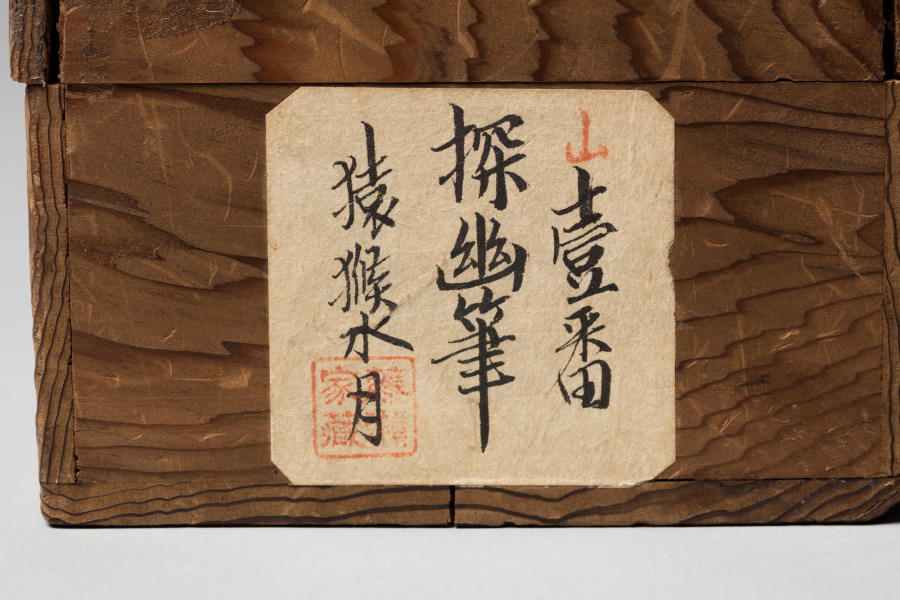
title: Gibbons Reaching for the Moon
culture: Japan, Edo period (1615–1868)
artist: Kano Tan’yū (Japanese, 1602–1674)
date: 1600s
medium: Hanging scroll; ink and light color on silk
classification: Painting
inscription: signed: "Tan'yūsai hitsu"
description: Long-armed gibbons form a chain to reach down from a tree, hoping to touch what they believe is the moon. In fact, the orb remaining beyond their grasp is the full moon’s reflection in the still surface of a pond or lake. The image is a common metaphor for the deluded mind in Buddhist thought. Gibbons do not live in Japan but were known to Japanese painters of the premodern era through paintings brought from China.